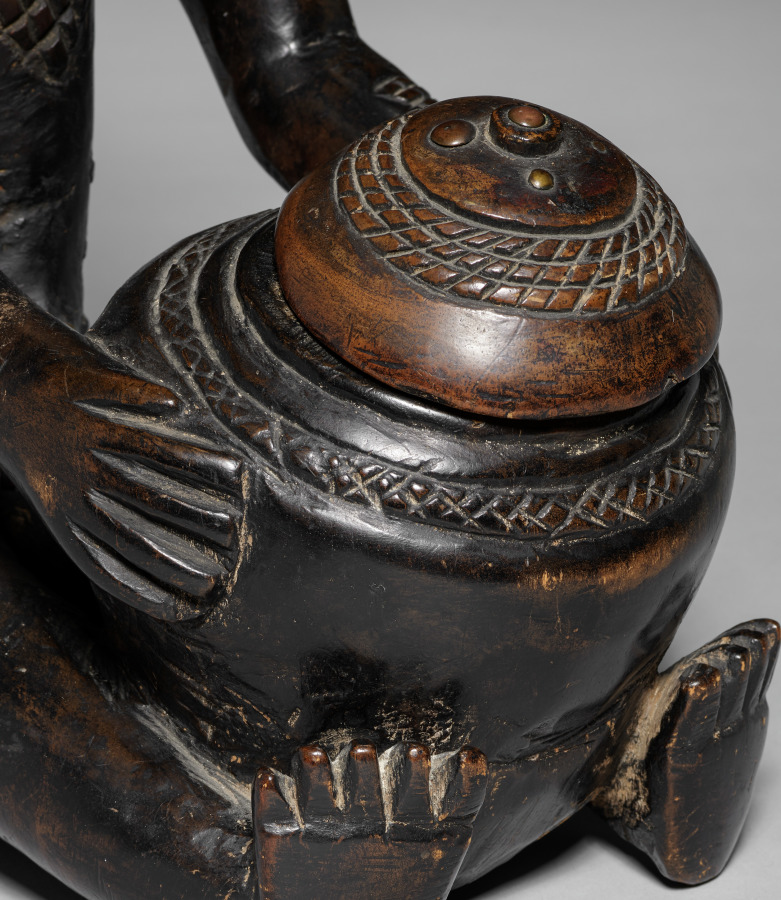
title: Female Bowl-Bearing Figure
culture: Africa, Central Africa, Democratic Republic of Congo, Luba-style carver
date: late 1800s-early 1900s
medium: Wood, glass beads, upholstery studs, plant fiber, and iron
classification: Sculpture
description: In Luba-style art, an object's beauty affects how well it works. While bowl-bearing figures had many possible uses, a royal diviner likely used this well-carved image of a woman carrying a bowl in rituals. Dusty traces of mpemba (white chalk) fleck the shining exterior and the bowl's interior, showing it once held this sacred powder. Diamond-shaped scarification marks at her waist, chest, and back add to her beauty. Her hair is carved into the cascading layered hairstyle worn in the Luba region at the turn of the twentieth century. Strands of imported glass beads encircle her waist and neck, and dangle from her hair. The alternating white and blue beads may symbolize the moon and Mbidi Kiluwe, a culture hero linked to royal practice and smithing. While much Luba-style art depicts women—who are societally important—men created and owned the majority of such works.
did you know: Symbolic of anvils, the round metal tacks decorating the figure's hair "pin" spirits and their secrets within it. They are at the hairline and each of the four hair cascades (the bottommost is now gone).